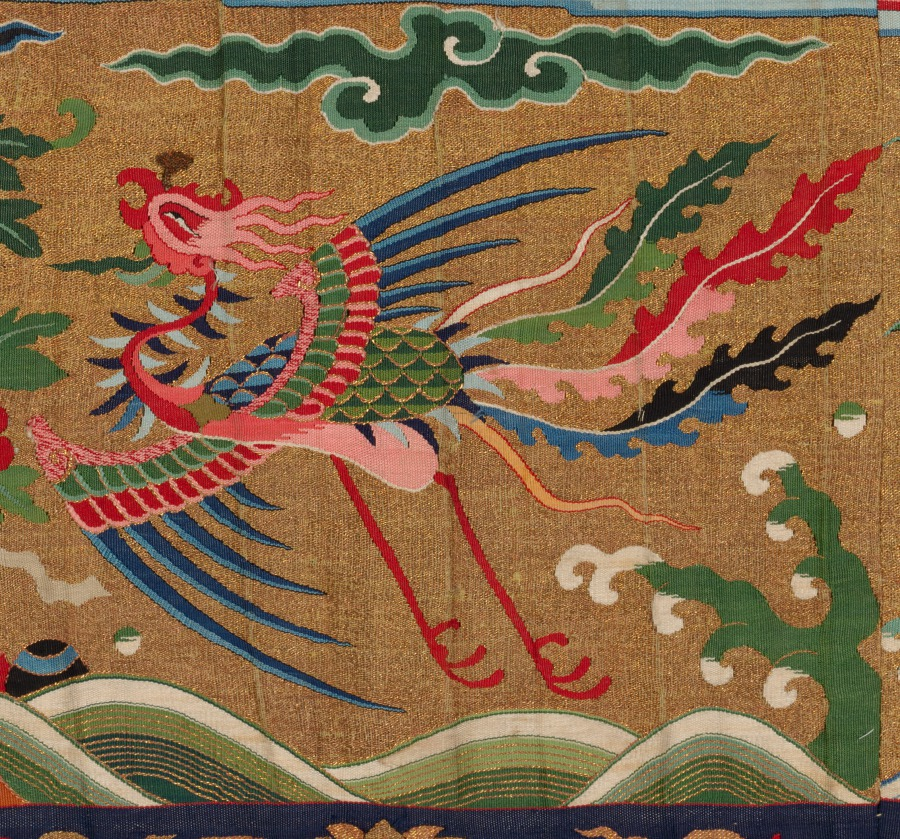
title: Strip of Silk Tapestry (Kesi)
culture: China, Qing dynasty (1644–1911)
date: 1700s–1800s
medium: Silk and gold thread; tapestry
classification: Tapestry